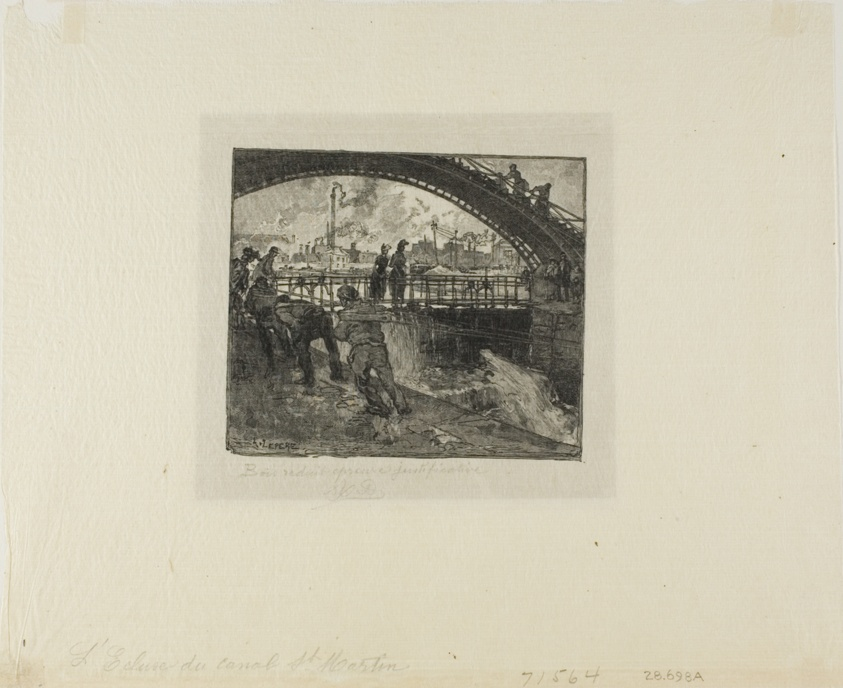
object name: Print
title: Lock of the Canal Saint-Martin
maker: Louis Auguste Lepère (French, 1849-1918)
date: 1890, published 1910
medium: Wood engraving in black on cream Japanese tissue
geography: France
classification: wood engraving; print; prints and drawing